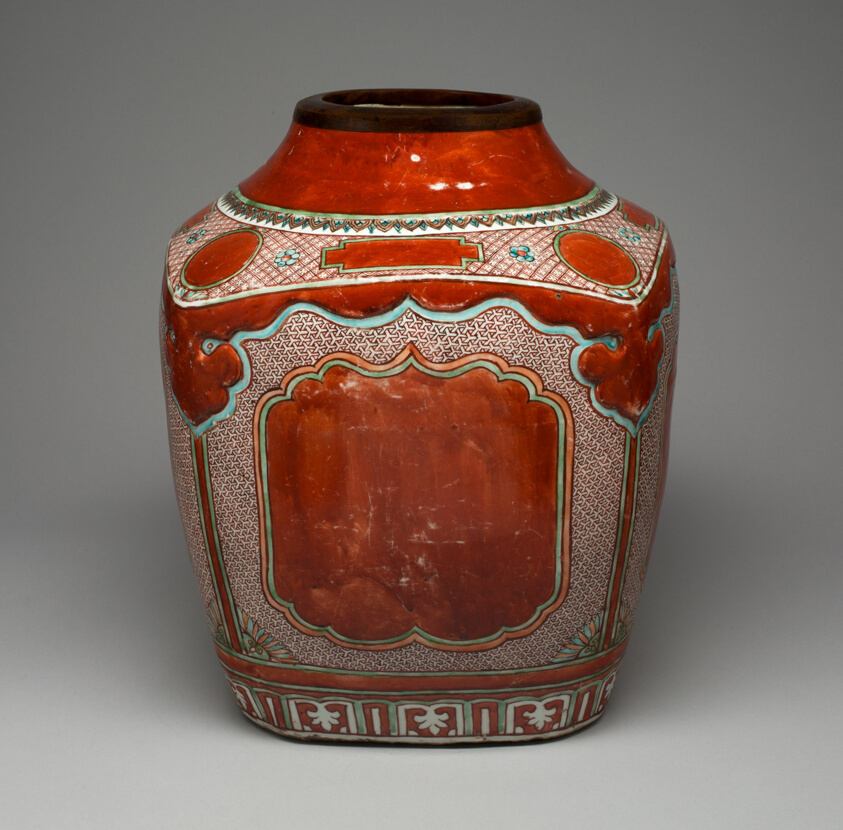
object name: Vessel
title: Rectangular Vessel with Truncated Neck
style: Chinese (culture or style)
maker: China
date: Ming dynasty (1368–1644), 16th century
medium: Kirande-type ware; porcelain painted in overglaze enamels and gilded detail; metal rim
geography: China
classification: vessel; porcelain; asian art; ceramics